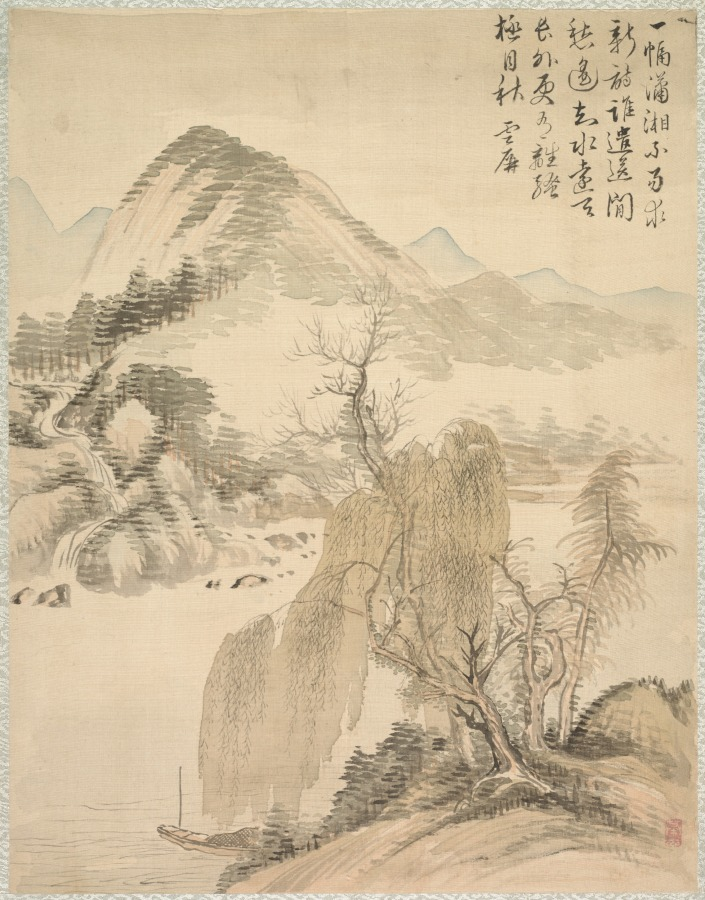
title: Willow and Waterfall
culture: Japan, Edo period (1615–1868)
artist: Tsubaki Chinzan (Japanese, 1801–1854)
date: 1847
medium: album leaf; ink and color on silk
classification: Portfolio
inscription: Tsubaki Chinzan inscribed each leaf with the same inscription that Zhai Dakun wrote on his album leaves.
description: As the title of this album suggests, Tsubaki Chinzan painted each of the landscapes included in the album after interpretations of the styles of old masters by Chinese painter Zhai Dakun (翟大坤, active 1730–1804). In addition to the painted compositions, he also copied the inscriptions on Zhai Dakun's paintings.